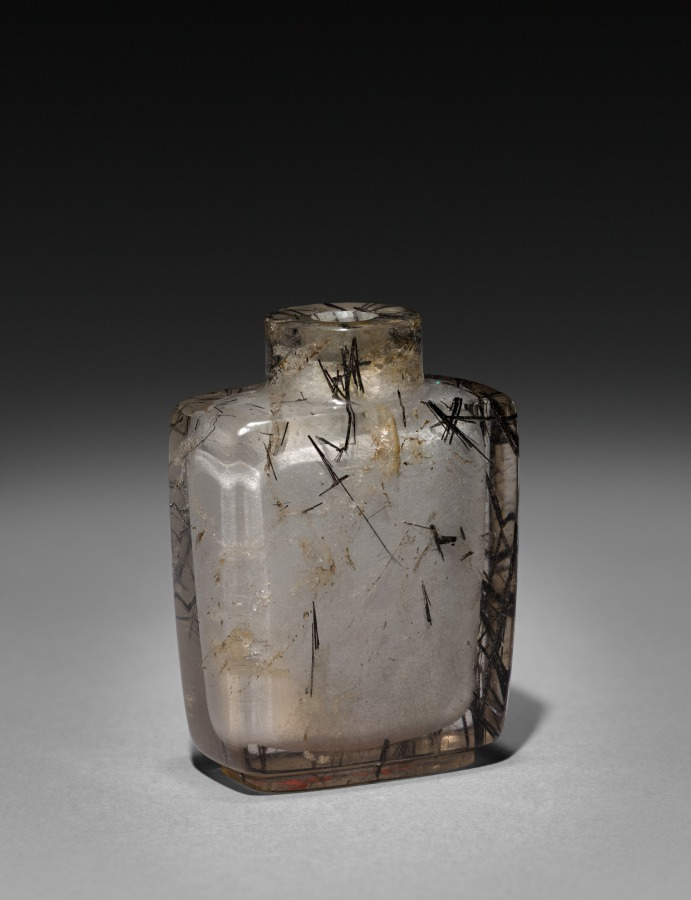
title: Snuff Bottle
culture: China, Qing dynasty (1644-1911)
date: 1644–1911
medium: glass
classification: Glass